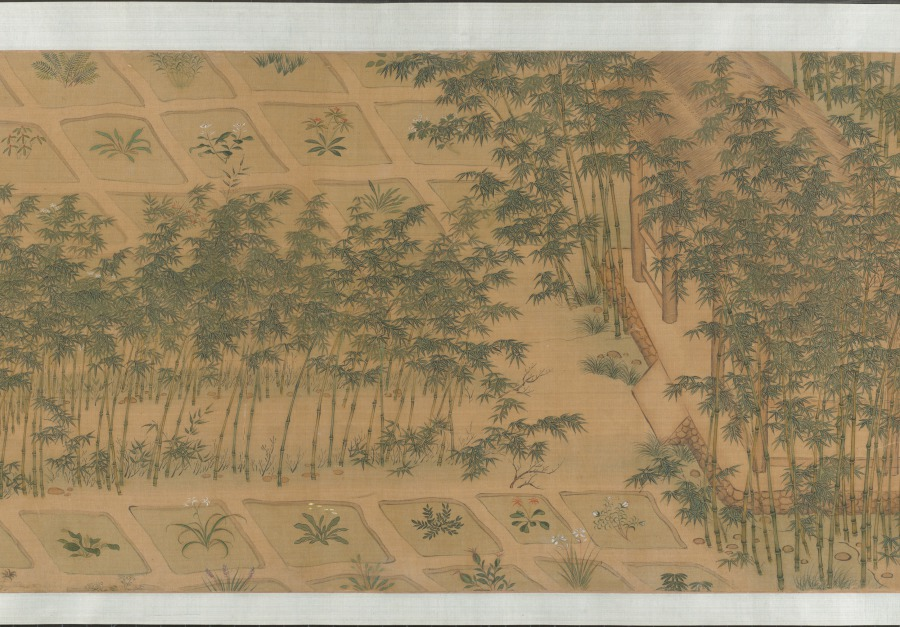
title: Garden for Solitary Enjoyment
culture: China, Ming dynasty (1368–1644)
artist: Qiu Ying (Chinese, 1494–1552)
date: 1515–52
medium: Handscroll; ink and light color on silk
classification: Painting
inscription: Accompanying text of an essay together with seven poems of Sima Guang (1019–1086) and one poem of Su Shi (1037–1101) written by Wen Zhengming (1470–1559) in 1558.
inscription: 2 colophons and 82 seals: 4 seals of Wen Zhengming 文徵明 (1470–1559); 59 seals of Xiang Yuanbian 項元汴 (1525–1590); 1 colophon, dated 1644, and 7 seals of Xiang Yukui 項禹揆 (c. late 1500s–1659); 1 colophon, dated 1880, and 2 seals of Weng Tonghe 翁同龢 (1830–1904); 2 seals of Ch'eng Chen-i (19th c.); 1 seal of Han Ch'ung (19th c.); 4 seals of Wan-go H. C. Weng 翁萬戈 (1918–2020); 3 seals unidentified.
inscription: Colophon by Xiang Yukui 項禹揆 (c. late 1500s–1659): The painting of The Garden for Self-enjoyment on the right by Shih-chou, Mr. Qiu [Qiu Ying] is in the style of Li Lung-mien. Its mood is peaceful, as if meeting the ancient gentlemen face to face among the brushes and silk; it lifts one above the sordid bustle of life. Formerly, my late father handed me this scroll which had only the painting without the written essay. I considered asking a good calligrapher to write the essay to add to it but was afraid that the quality of the writing would not match the painting. Several years later, I saw at a friend's house this essay and poems (of Ssu-ma Kuang] written by Hengshan [Wen Zhengming], once owned by my grandfather; so I spared no expense to obtain it. I rejoiced at this and said: "The divine swords are finally united. How things are pre-destined!" Now my friend Chang Kung-chao's technique for mounting [painting and calligraphy] is excellent. Therefore by daring to take them out and join them together, I can preserve this beautiful story of singular reunion. Xiang Yukui recorded at Hai-yeh-t'ang [hall] two days before New Year's Eve in the jiasheng year of the Chongzhen era [1644]. trans. LYSL/HK/WKH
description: Garden of Solitary Enjoyment refers to a site built in 1073 by the statesman Sima Guang (1019–1086) after he had retired to Luoyang, Henan province. Every spring, visitors would flock to his garden. Each of its seven structures references a historic figure. Sima wrote: I channel streams [like Du Mu], to water flowers [like Bai Juyi], or trim bamboo [like Wang Huizhi]. . . . I know of no joy between heaven and earth that could take its place. Qiu Ying’s painting, created after an 11th-century version of the same theme, must have appealed to garden owners of the Ming dynasty, since it became the template for numerous Suzhou workshop copies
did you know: Sima Guang completed his monumental survey of Chinese history, Zizhi tongjian, in the garden depicted in this painting.